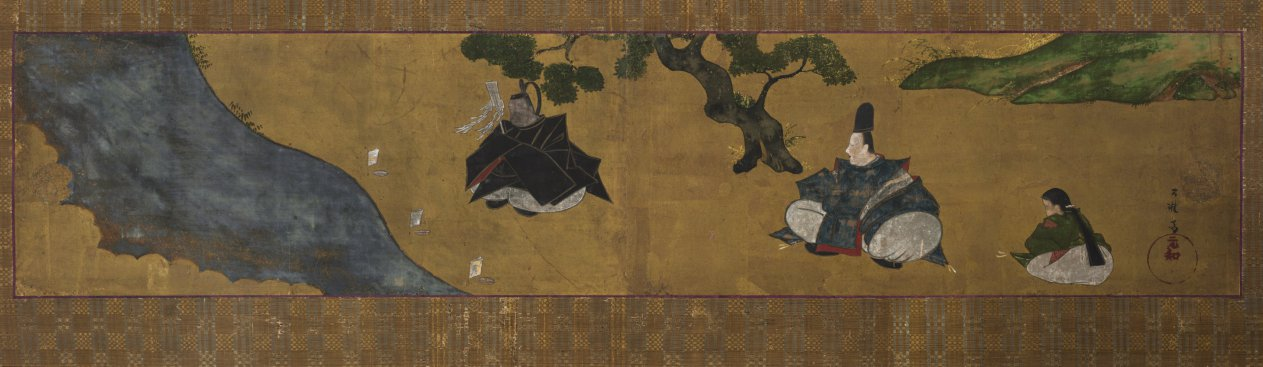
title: Ablution Scene (Misogi)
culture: Japan, Edo period (1615–1868)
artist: Tawaraya Sōri (Japanese, active late 1700s)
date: late 1700s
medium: hanging scroll, ink, color and gold leaf on paper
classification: Painting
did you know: Three clues to this composition’s original format—a pair of doors to a cabinet shelf—are the two circles at either end, the seam down the center, and the size of the image.